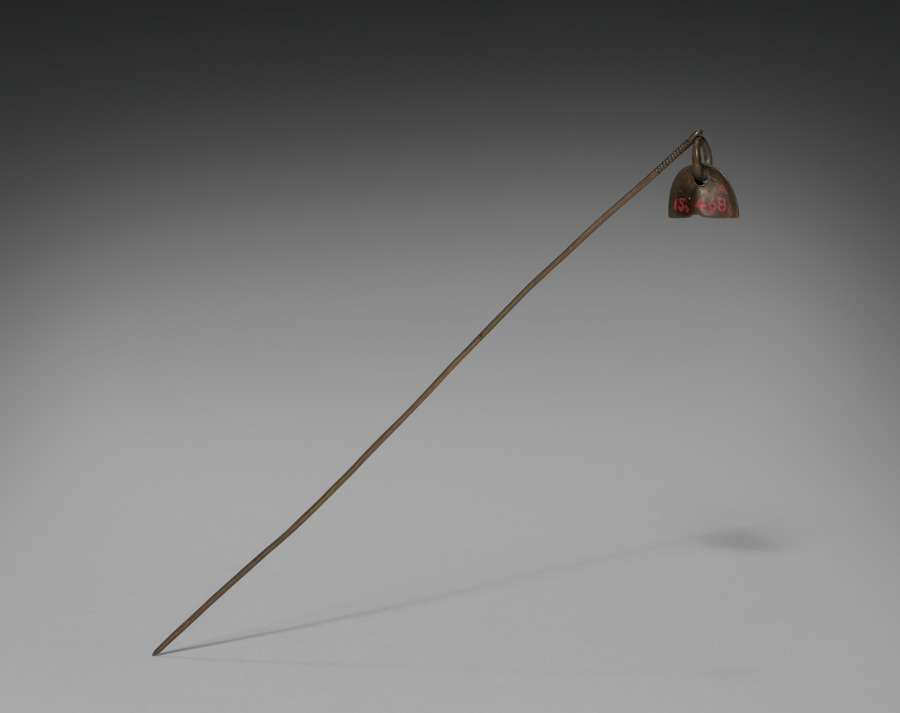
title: Pin (ndwong angwoong) for Hat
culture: Africa, Central Africa, Democratic Republic of the Congo, Kuba-style maker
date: early 1900s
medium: Metal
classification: Implements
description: Stick pins were practical, securing a hat to a man's hair. They were also a way to display social status. The material, attachments, number, or placement of metal stick pins were all significant. The miniature bell on this pin gives it the name ndwong angwoong. It was placed so that the bells dangled over the wearer's forehead.